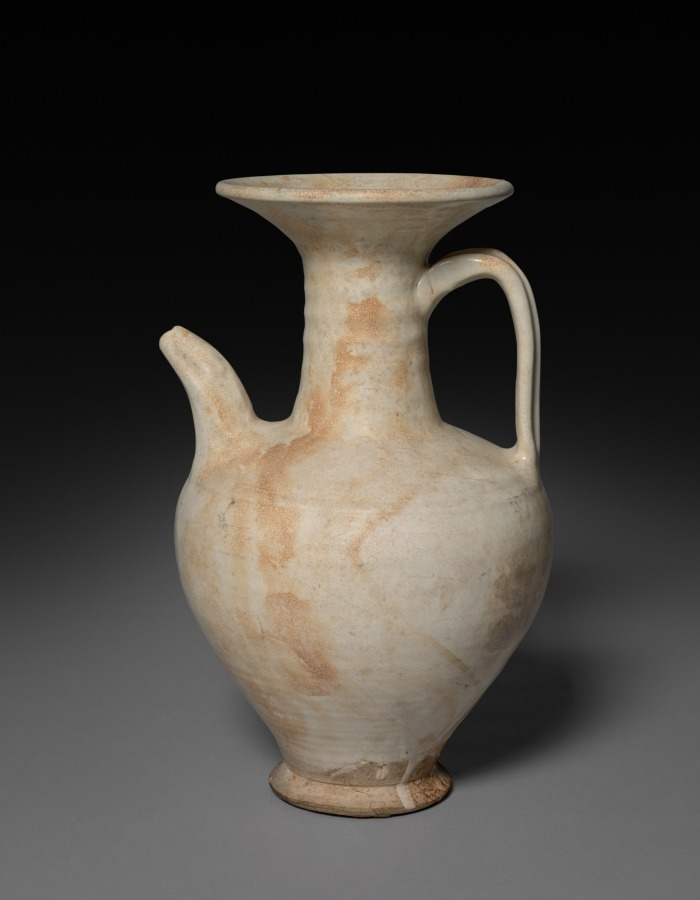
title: Ewer: Cizhou ware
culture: China, Northern Song dynasty (960-1127)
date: 1105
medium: buff stoneware with underglaze slip coating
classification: Ceramic